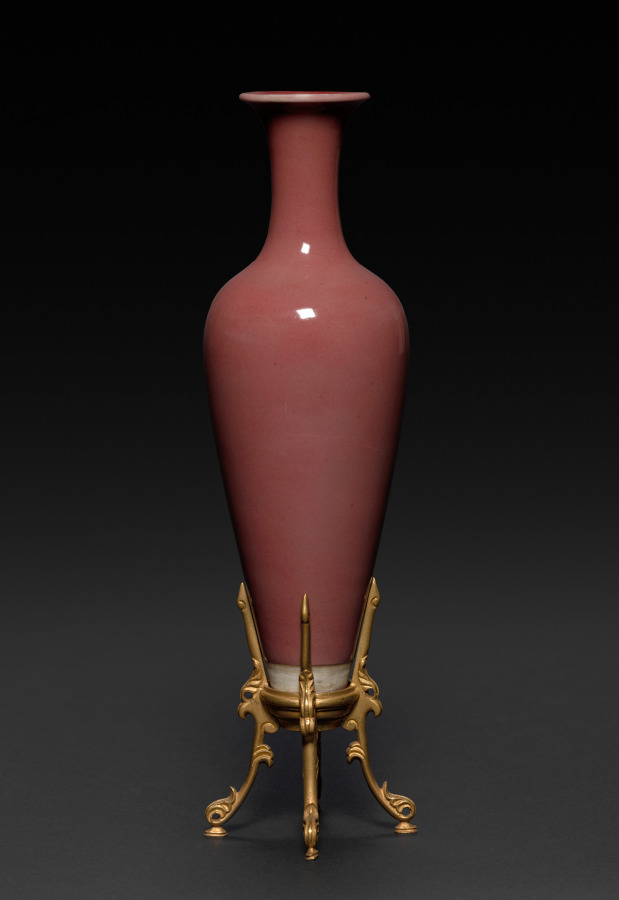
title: Bottle with Peach Bloom Glaze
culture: China, Qing dynasty (1644-1911), Kangxi reign (1661-1722)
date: 1662–1722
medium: porcelain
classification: Ceramic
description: The "peach-bloom" glaze developed during the Kangxi era has also been described as "drunken with beauty." Technical achievements were transcended with aesthetic associations, revealing the greatest sensitivity to all things beautiful in nature.